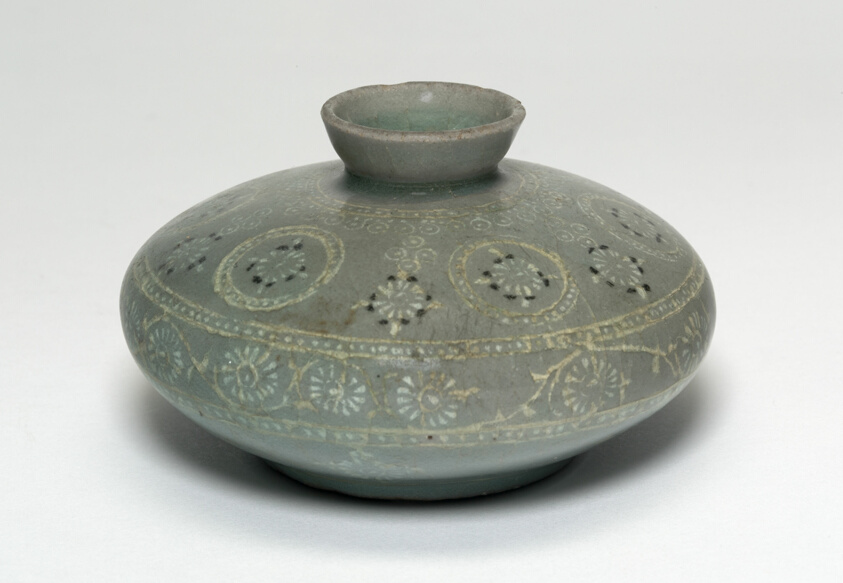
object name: Decorative Arts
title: Oil Bottle with Chrysanthemum Flower Heads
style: Korean (culture or style)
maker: Korea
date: Goryeo dynasty (918–1392), late 13th century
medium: Celadon-glazed stoneware with underglaze inlaid decoration of black and white clays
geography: Korea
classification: ceramics; asian art; decorative arts